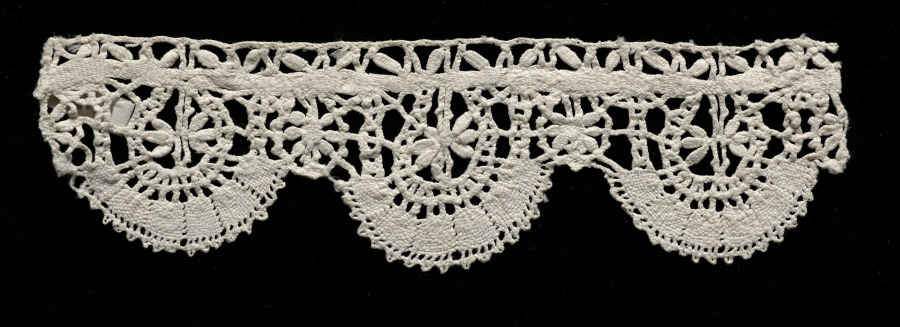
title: Lace Edging of Bell Points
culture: Italy, Genoa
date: 1600s–1700s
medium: Bobbin lace (rose lace)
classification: Lace